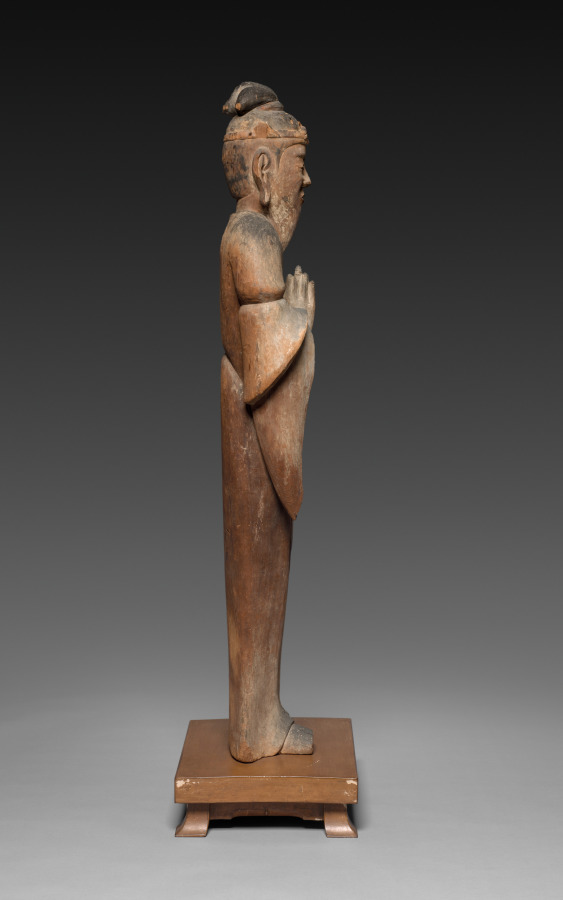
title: Deity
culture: Japan, Heian period (794–1185)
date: 1100s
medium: Magnolia wood with traces of color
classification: Sculpture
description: This unidentified sculpture represents a mature male figure with a long beard. His robes, crown-like head ornament, and hair arranged into a topknot resemble the attire and styling of members of the heavenly realm—tenbu in Japanese—of the Buddhist cosmos. The comparatively simple design, along with carving marks purposely left by the sculptor throughout the surface tend to be associated with sculptures of kami, deities venerated at shrines, or jinja.